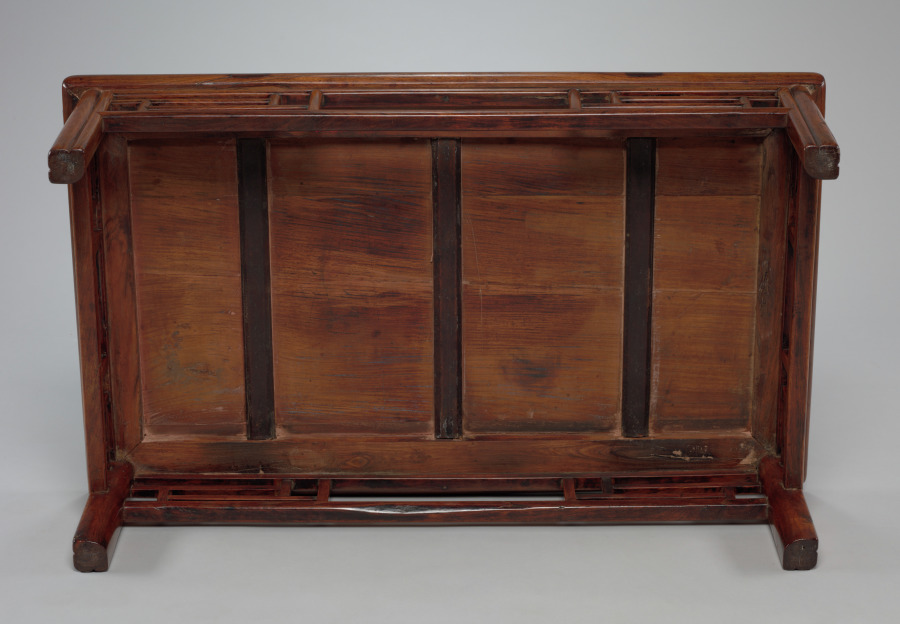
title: Table to hold a chest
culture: China, Qing dynasty (1644-1911)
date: early 1700s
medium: Rosewood (huanghuali)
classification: Furniture and woodwork